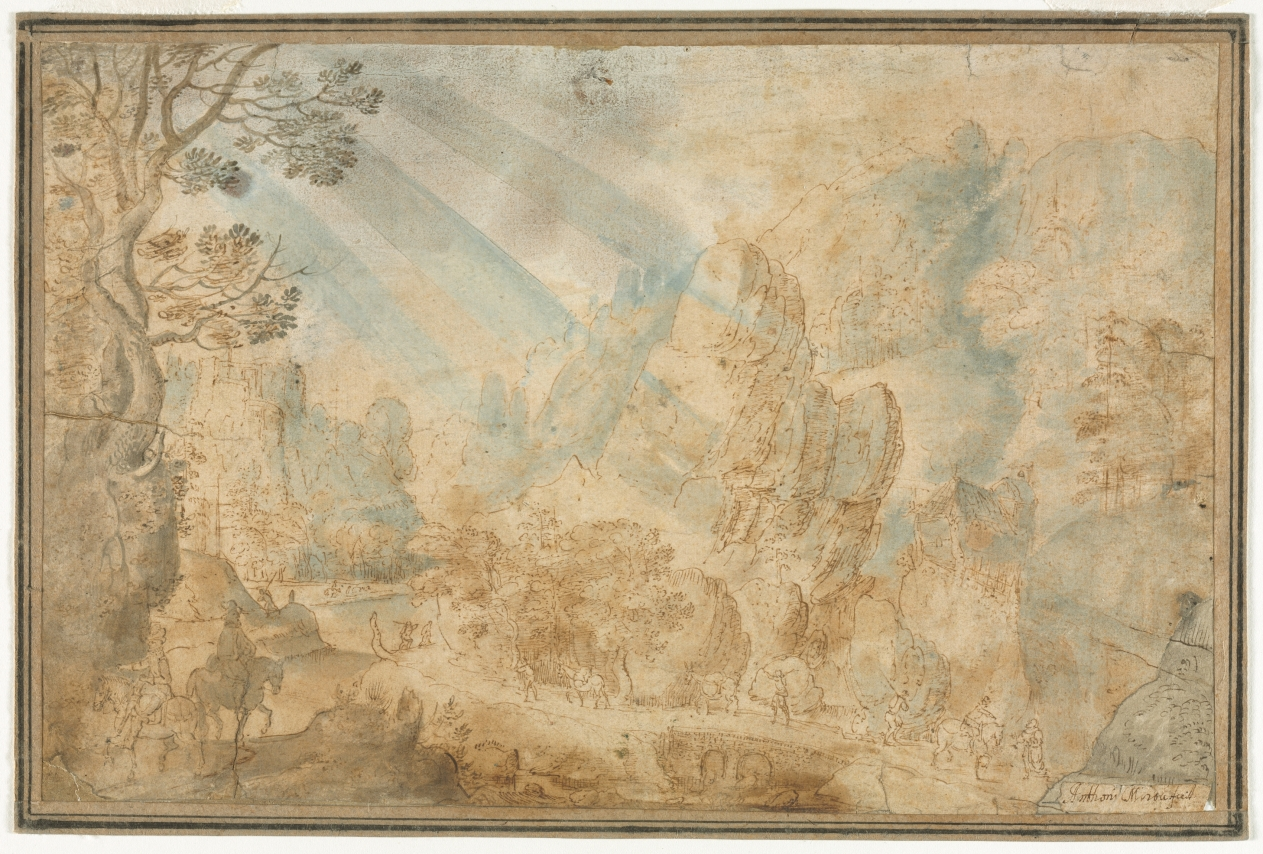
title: Mountain Landscape with Figures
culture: Flanders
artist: Anton Mirou (Flemish, before 1586–after 1661)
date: 1600–1650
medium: pen and brown ink and brush and gray wash with blue and green watercolor, over traces of black chalk, with white paint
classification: Drawing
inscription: falsely signed, lower right (on seperate piece of paper, laid down on secondary support), in brown ink: Anthons Mirou. fecit ; VERSO OF SECONDARY SUPPORT, upper left, in graphite(?): 2 [underlined] ; upper left, [media not discernable]: 40 ; upper center, in graphite: 37 ; upper right, in graphite: 4/ ; lower left, in graphite: 240 [underlined] ; lower left, in brown ink: 120 [underlined] ; lower left, in brown ink: No. 101. ; VERSO OF TERTIARY SUPPORT (now removed), lower left, in graphite: No 26